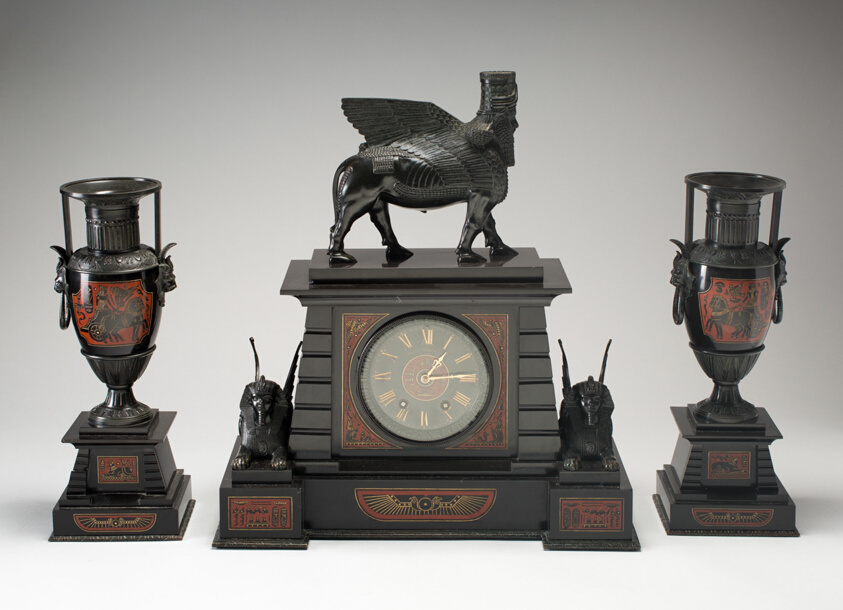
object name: Decorative Arts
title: Urn (one of a pair)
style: egyptian revival, european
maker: Brocot; French, 19th century; Paris, France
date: 1875/90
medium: Black marble with red, gold, and black inlaid decoration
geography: Paris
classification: stone; european decorative arts; decorative arts